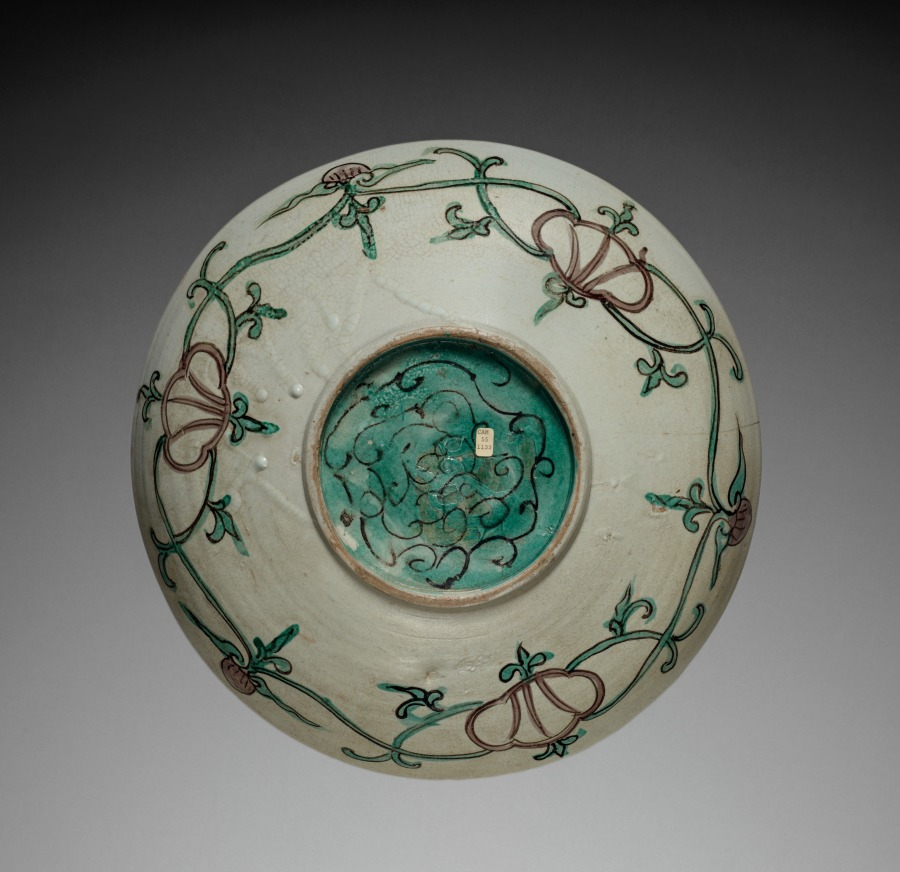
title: Plate with Peonies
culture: Japan, Edo period (1615–1868)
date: early to mid-1800s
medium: porcelain with decoration in overglaze enamels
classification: Ceramic